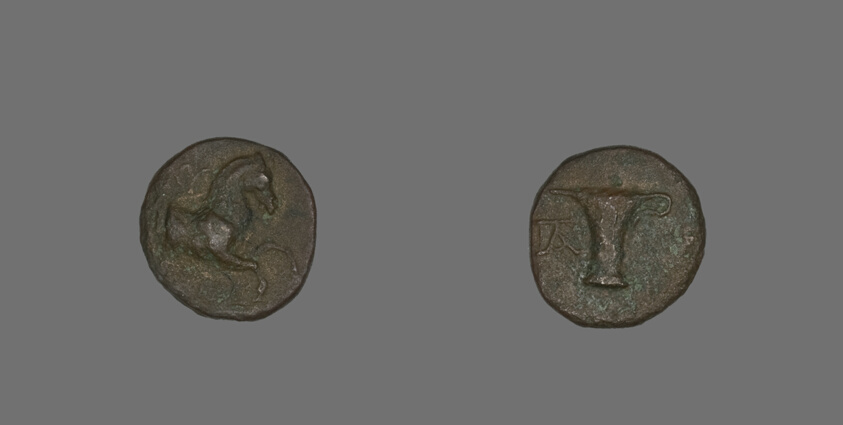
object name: Coin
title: Coin Depicting a Horse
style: greek, ancient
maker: Greek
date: 320-250 BCE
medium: Bronze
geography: Greece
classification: coin; ancient art; struck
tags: horses